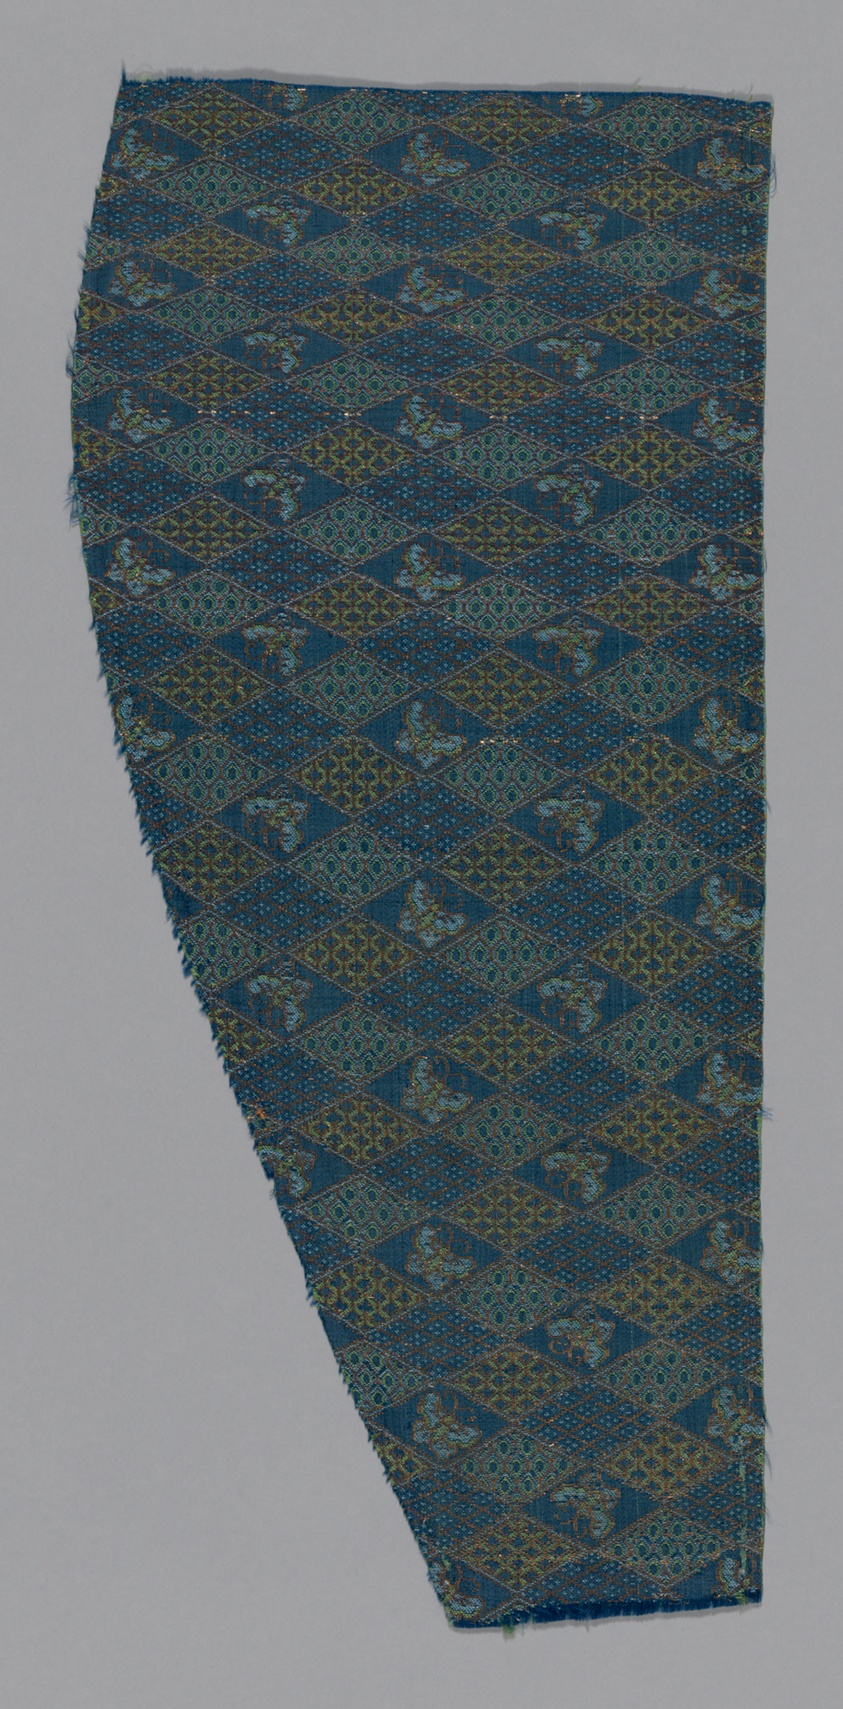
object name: Textile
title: Fragment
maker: Japan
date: Edo period (1615–1868), 1750/1800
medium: Brocaded fancy compound twill, wilk and gilt paper; 2 1/2 strips to m.m.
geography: Japan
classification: textile; weaving